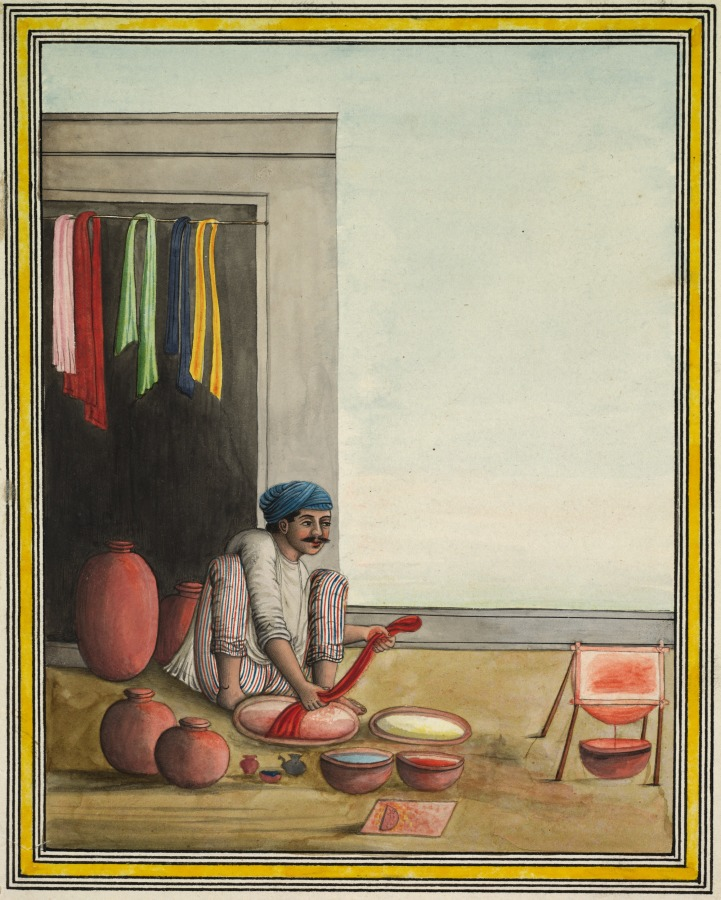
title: Man Dyeing Cloth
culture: India, Company School, Lucknow, 19th century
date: early 1830s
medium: Gum tempera and ink on paper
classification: Painting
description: Members of the British East India Company, largely merchants themselves, collected picture books that were compendiums of Indian professions and occupations, made by a new class of commercial Indian artists. They often emphasized the exotic and primitive aspects of life in India, such as the turbaned, pajama-clad man, squatting on the ground with a blank expression, making dye and hand-coloring strips of cloth using simple terracotta vessels.